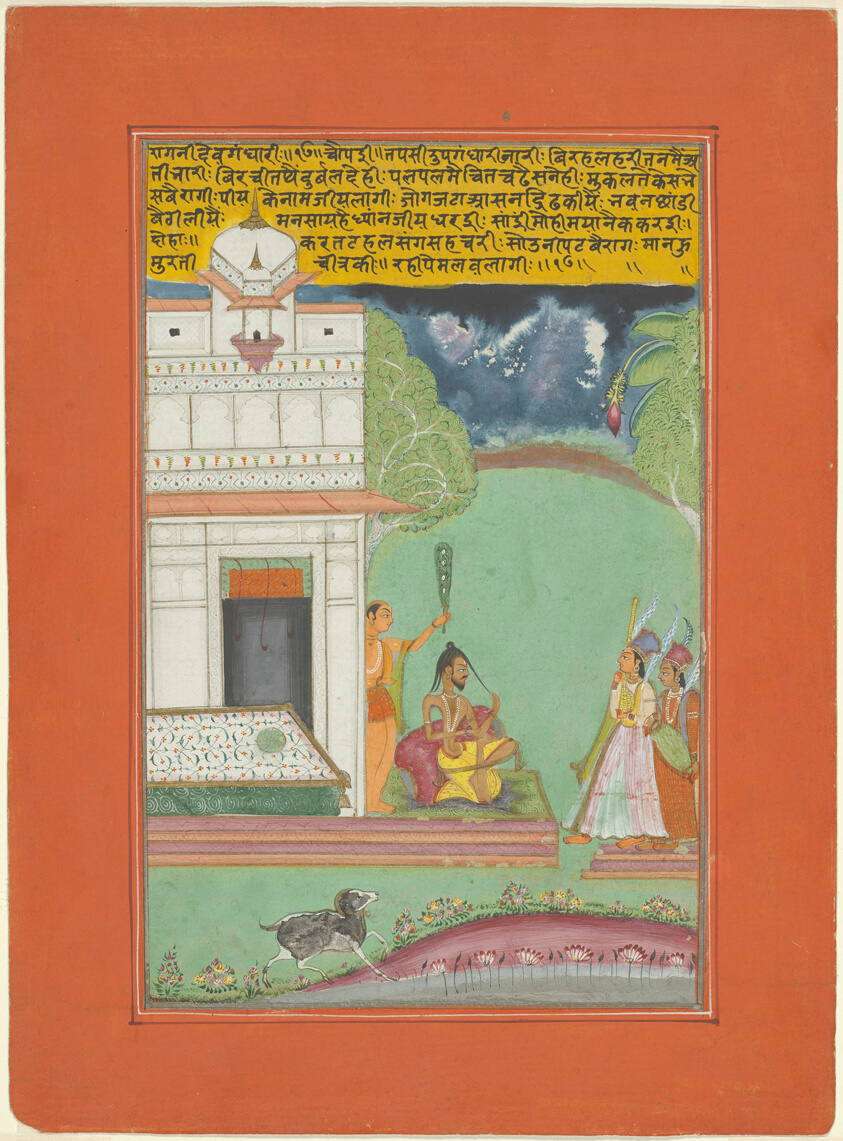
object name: Painting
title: Ragini Devagandhari, Page from a Jaipur Ragamala Set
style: South Asian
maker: India; Rajasthan, Jaipur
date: c. 1750-1770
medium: Opaque watercolor and gold on paper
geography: Rajasthan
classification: miniature painting; painting; asian art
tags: music, musicians